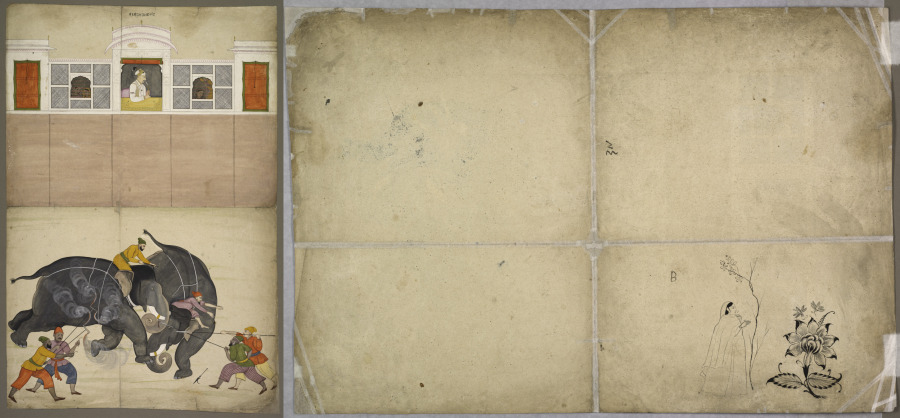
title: Two Elephants Fighting in a Courtyard Before Muhammad Shah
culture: Northern India, Himachal Pradesh, Guler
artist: attributed to Nainsukh (Indian, 1710–1778)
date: c. 1730–40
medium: Gum tempera, ink, and gold on paper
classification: Painting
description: The Mughal emperor responsible for a revival of courtly arts and pastimes was Muhammad Shah (reigned 1719–48). This painting was made by an artist from a small kingdom in the western Himalayas who stayed at the Mughal court in Delhi and painted scenes of his experiences. Like his predecessors, Muhammad Shah enjoyed watching elephant fights. He is shown in his window of public audience, marked by a golden carpet, smoking a hookah. Women from his harem can be seen looking on from behind painted screens. Two pairs of men hold fire brands and spears to prevent the elephants from running off and to keep them under control. The intensity of the fight—captured at a moment when one mahout, or elephant trainer, has dropped his goad and is about to jump off—is augmented by the dense colors and forms in contrast to the otherwise pale planes, balanced only by the strip of palace windows.